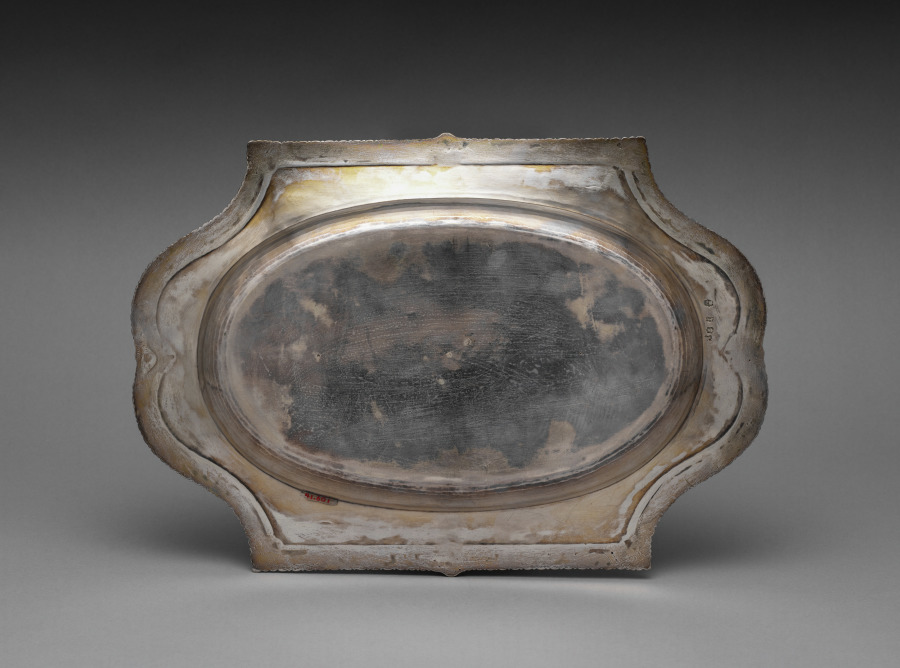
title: Tray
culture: England, 18th century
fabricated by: Paul Jacques de Lamerie (British, 1688–1751)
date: 1745–1746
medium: silver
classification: Silver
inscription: Scratched underside: "No 4.", "41 = 0 1/2".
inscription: Two crests engraved on either side of face: A lion and the other states, "Tout Est Vanite".